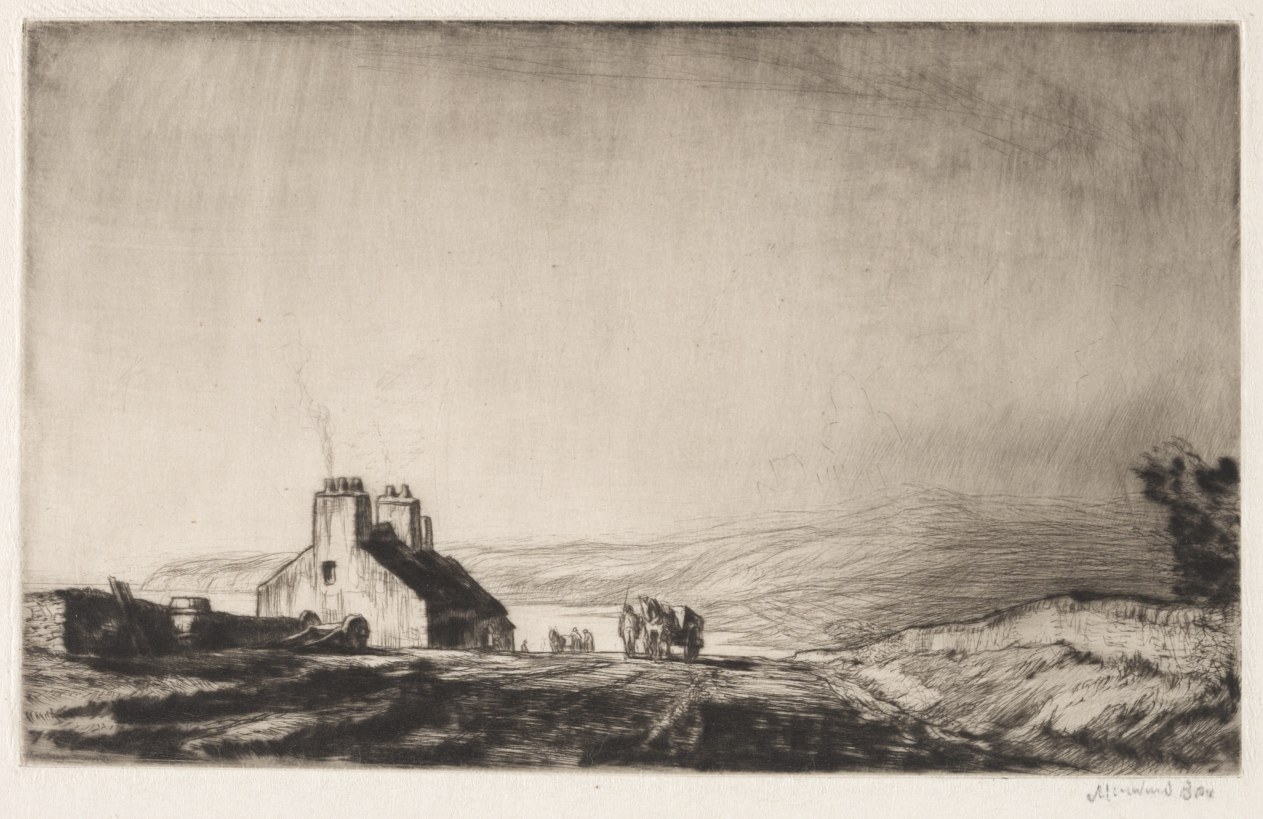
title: The Ballantrae Road, Ayrshire, Scotland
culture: England, 20th century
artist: Muirhead Bone (British, 1876–1953)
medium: drypoint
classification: Print